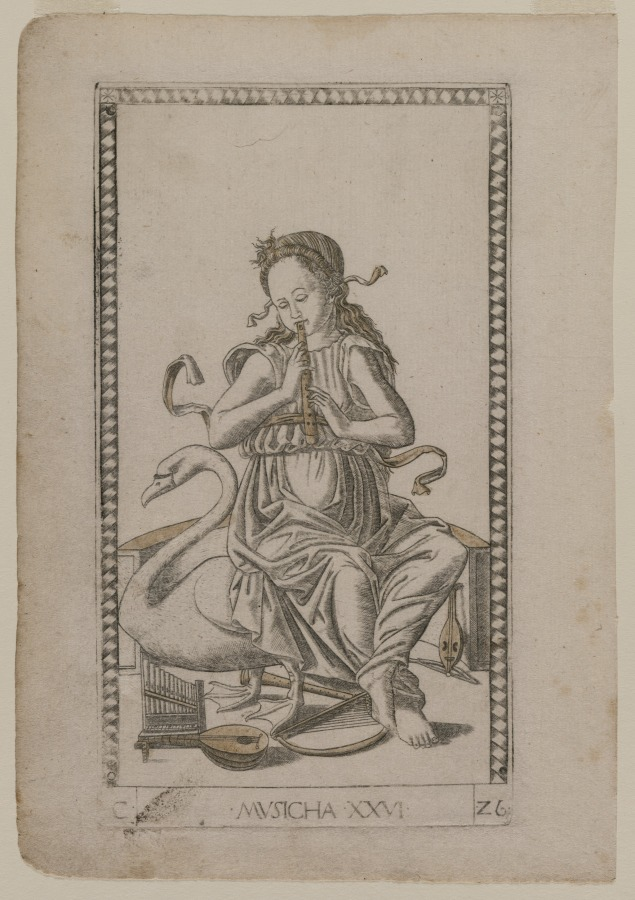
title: Music (from the Tarocchi, series C: Liberal Arts, #26)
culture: Italy, Ferrara, 15th century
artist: Master of the E-Series Tarocchi (Italian, active 1460s)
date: before 1467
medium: engraving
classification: Print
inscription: Lettered below the image of Musicha (Music): C· / ·MUSICHA·XXVI· / ·26·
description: This engraving is part of the group “C” named Liberal Arts. Conceptually, the liberal arts descended from classical antiquity, and were divided into the Trivium (Grammar, Rhetoric, and Dialectic or Logic) and the Quadrivium (Music, Geometry, Arithmetic, and Astronomy). In the Tarocchi set the total number was risen to ten, with the addition of the three disciplines (Poetry, Philosophy, and Theology). The liberal arts denoted knowledge or skills considered necessary to participate in a free society. By the late Middle Ages, they began to be represented in the visual arts as womanlike allegories. Here, Musicha (Music) is personified as a young female figure seated upon a swan and playing a recorder, known simply as a flute in the 15th century. At her feet are numerous musical instruments including a portative organ, lute, shawm, harp, and rebec. The swan can be interpreted as a symbol of song, based upon the ancient belief that this bird, which is mute all its life, sings in exquisite tones shortly before it dies.